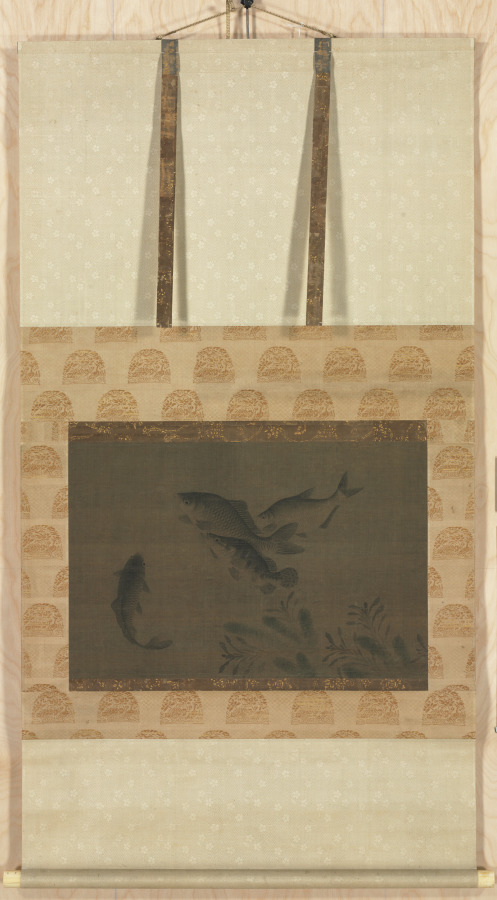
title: Fish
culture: China, Ming dynasty (1368–1644)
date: c. 1400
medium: hanging scroll, ink and slight color on silk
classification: Painting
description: Four fish of various sizes are swimming among aquatic plants. Like in other paintings, the existence of water is suggested in the harmonious movement of the fish and plants. In Chinese, the word for fish (yu) is a homophone for “abundance” and thus the motif has an auspicious connotation. The painter uses the so-called boneless technique without outlines to shade and texture the bodies of the fish. The smooth transition from dark shades on their backs to their white bellies and the thin transparent fins and tails in light washes accentuated by gills and scales are all executed without contour lines.